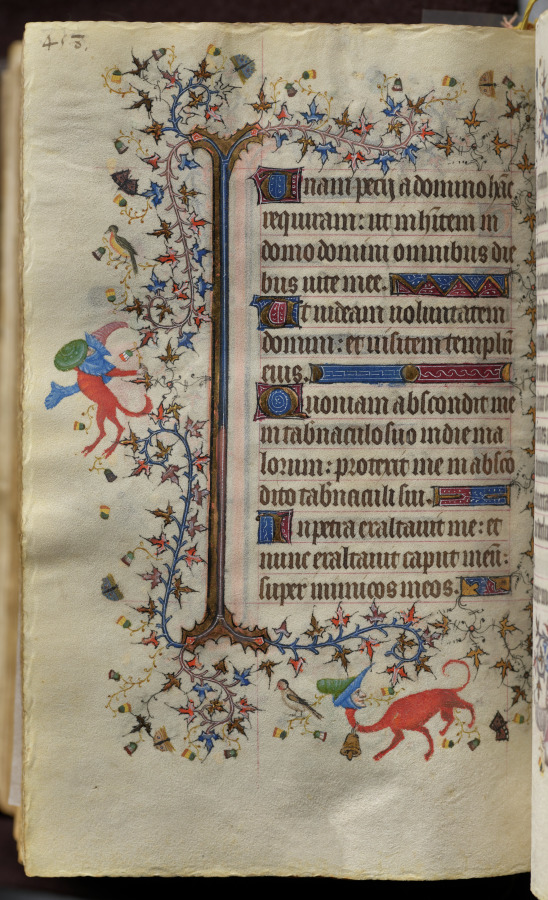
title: Hours of Charles the Noble, King of Navarre (1361-1425): fol. 223v, Text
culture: France, Paris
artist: Master of the Brussels Initials and Associates (French)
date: c. 1405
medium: ink, tempera, and gold on vellum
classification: Bound Volume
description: This precious volume was obviously highly prized by its owner, the French-born King of Navarre, who had his coat of arms painted on no less than twenty folios. Rather than directly commissioning this manuscript from a specific workshop, it seems that Charles the Noble acquired his book of hours -- perhaps ready-made for the luxury market -- while on a trip to Paris in 1404-05. A collaborative effort, six painting styles are evidenced within the pages of this codex, those of two Italians, two Frenchmen, and two Netherlanders. The painter who was responsible for the planning and decoration of the book, and who produced seventeen of the large miniatures, was a Bolognese artist known as the Master of the Brussels Initials. His principal assistant, responsible for most of the borders, was a Florentine who signed his name "Zecho" da Firenze on folio 208 verso.